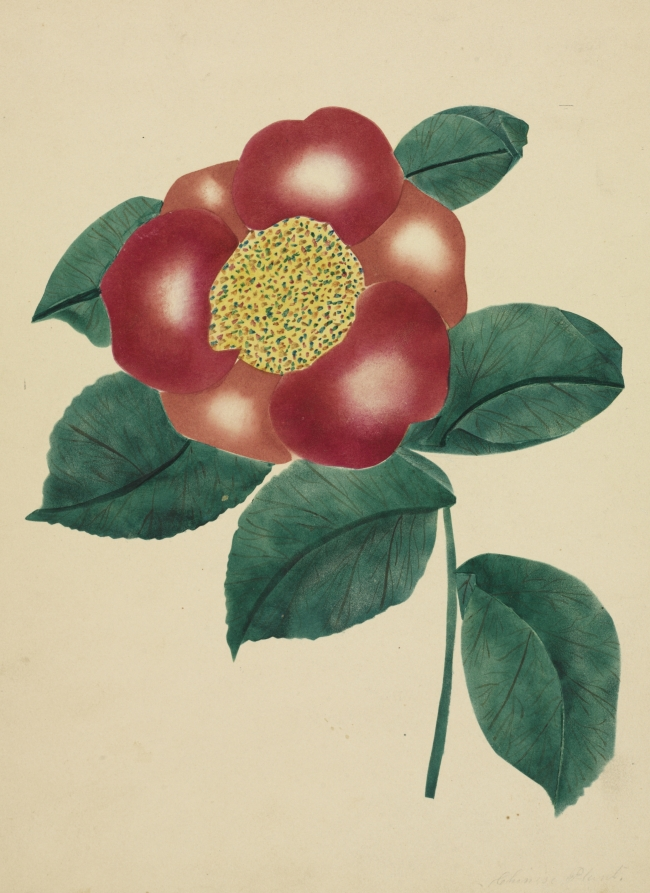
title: Chinese Flower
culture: America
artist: Mary Altha Nims (American, 1817–1907)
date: 1800s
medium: watercolor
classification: Drawing